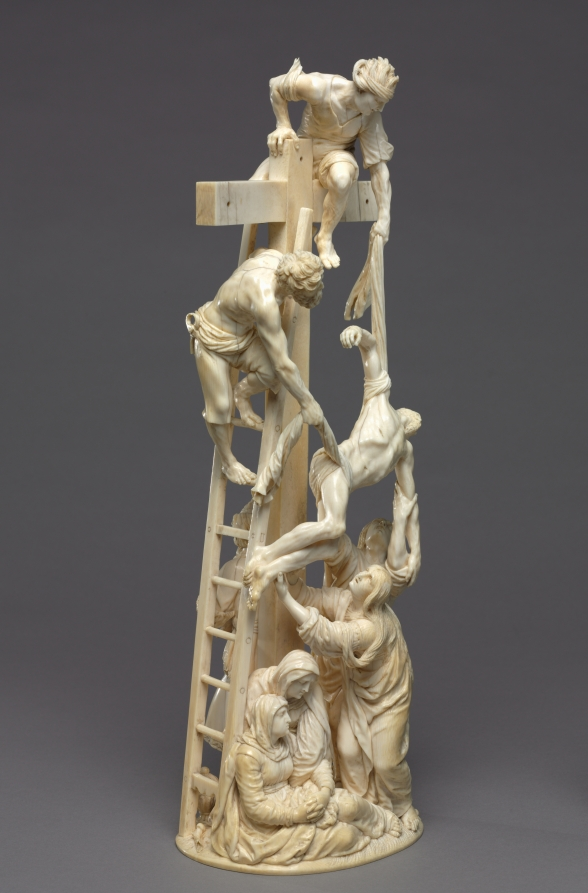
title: Descent from the Cross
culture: Austria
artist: Adam Lenckhardt (German, 1610–1661)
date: 1653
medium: ivory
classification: Sculpture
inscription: inscribed with monogram "AL" conjoined and dated 1653.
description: Carved from a single piece of ivory for Prince Karl Eusebius von Liechtenstein of Vienna, this work is a true tour-de-force. It took Lenckhardt seven years to complete; it is his last known sculpture and the pinnacle of his career. The biblical accounts of the descent from the cross found in the gospels are not consistent, which may contribute to the difficulty in precisely identifying the figures. The Virgin Mary, Saint John, Mary Magdalene, and others were said to be present, but undoubtedly there are other disciples here mourning Christ’s death. The intense emotion registers on the faces of the figures in the scrupulous and exquisitely detailed work.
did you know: Carved from a single elephant tusk, the artist took special care to ensure the ivory did not crack or break as he meticulously crafted each figure in this visually exciting sculpture. Look closely to find tools and small objects included near its base.